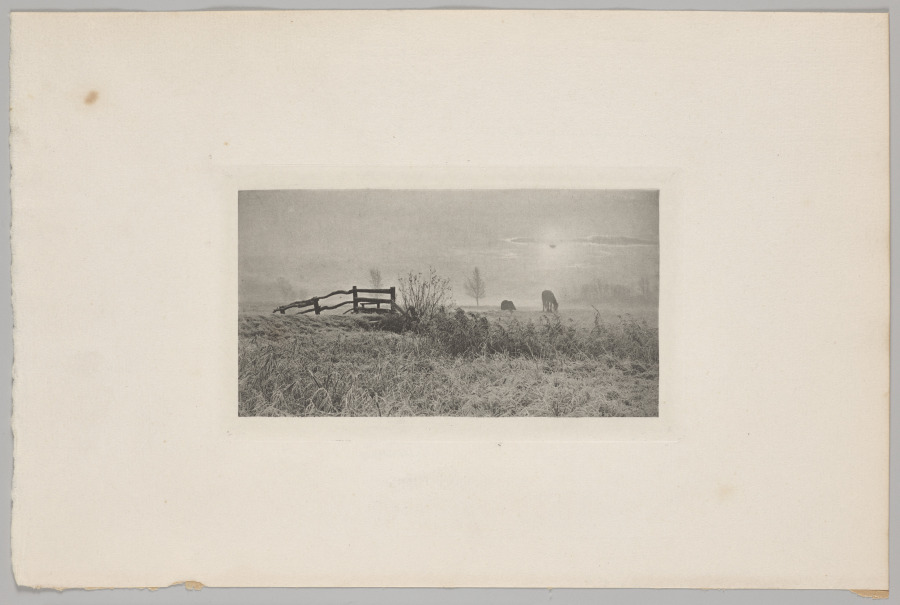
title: A Winter's Sunrise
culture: England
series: Marsh Leaves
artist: Peter Henry Emerson (British, 1856–1936)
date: before 1891, published 1895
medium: photogravure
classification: Photograph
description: Marsh Leaves, in which this image appears, was Emerson’s last book of photographs. Published in 1895, it is generally considered his best and most influential body of work. He had moved from naturalism to a graphic style so radical that it sometimes verged on abstraction. This looser, more expressionistic, and emotional late style helped lay the groundwork for Pictorialist photography, which dominated fine art photography in the early 20th century.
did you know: In 1886, the year after completing medical school, Peter Henry Emerson became a full-time photographer and published his first book of photographs.